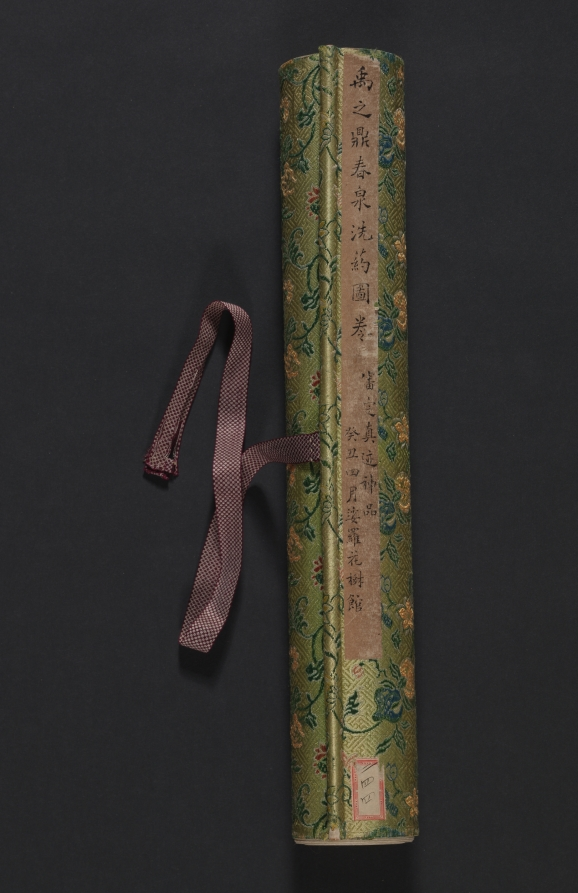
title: Cleansing Medicinal Herbs in the Stream on a Spring Day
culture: China, Qing dynasty (1644-1911)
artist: Yu Zhiding (Chinese, 1647–c. 1716)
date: 1703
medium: Handscroll; ink and color on silk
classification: Painting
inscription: Title by Chen Yixi.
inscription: 姑射仙人冰雪膚，新詩傳唱滿通都。/ 極知遲暮難為別，更展春泉洗藥圖。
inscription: Colophon by Chen Tingjing 陳廷敬 (1639–1712). Colophon by Wang Hongxu 王鴻緒 (1645–1723), dated 1707. Colophon by Song Luo 宋犖 (1634–1714). Colophon by Liu Yan 劉巗. Colophon by Jing Xikui 涇西夔. Colophon by Liu Yan 劉巗. Colophon by Cao Yin 曹寅. Colophon by Wang Shihong 汪士鋐. Colophon by Wang Shidan 王式丹 (1645–1718), dated 1712. Colophon by Shi Shenyi 史申義 (1661–1712), dated 1712. Colophon by Yin Yuqing 殷餘慶, dated 1712.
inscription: Colophon by Chen Shixia 陳時夏, dated 1729.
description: A famous portraitist, Yu Zhiding here depicts the likeness of Shi Shenyi 史申義 (1661–1712), an official and poet. Master Shi, a sickly man, was deeply interested in medicinal science. The opening section of the scroll features a boy washing a fungus in fresh spring water, a basket of medicinal herbs by his side. Other servants carry a fan, a bundle of scrolls, and a cup of tea or hot wine. Master Shi sits in a bamboo grove, surrounded by fields of herbs. Returning swallows, pink peach blossoms, and blooming magnolia indicate spring, whereas the fungus conveys wishes for long life. The spring theme may express the artist’s wish for his friend’s recovery.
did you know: In the pavilion are some of Shi Shenyi’s scholarly accoutrements: a stack of books, an antique zun 尊 (wine vessel), a brush holder, an ink stone, and a small chime.